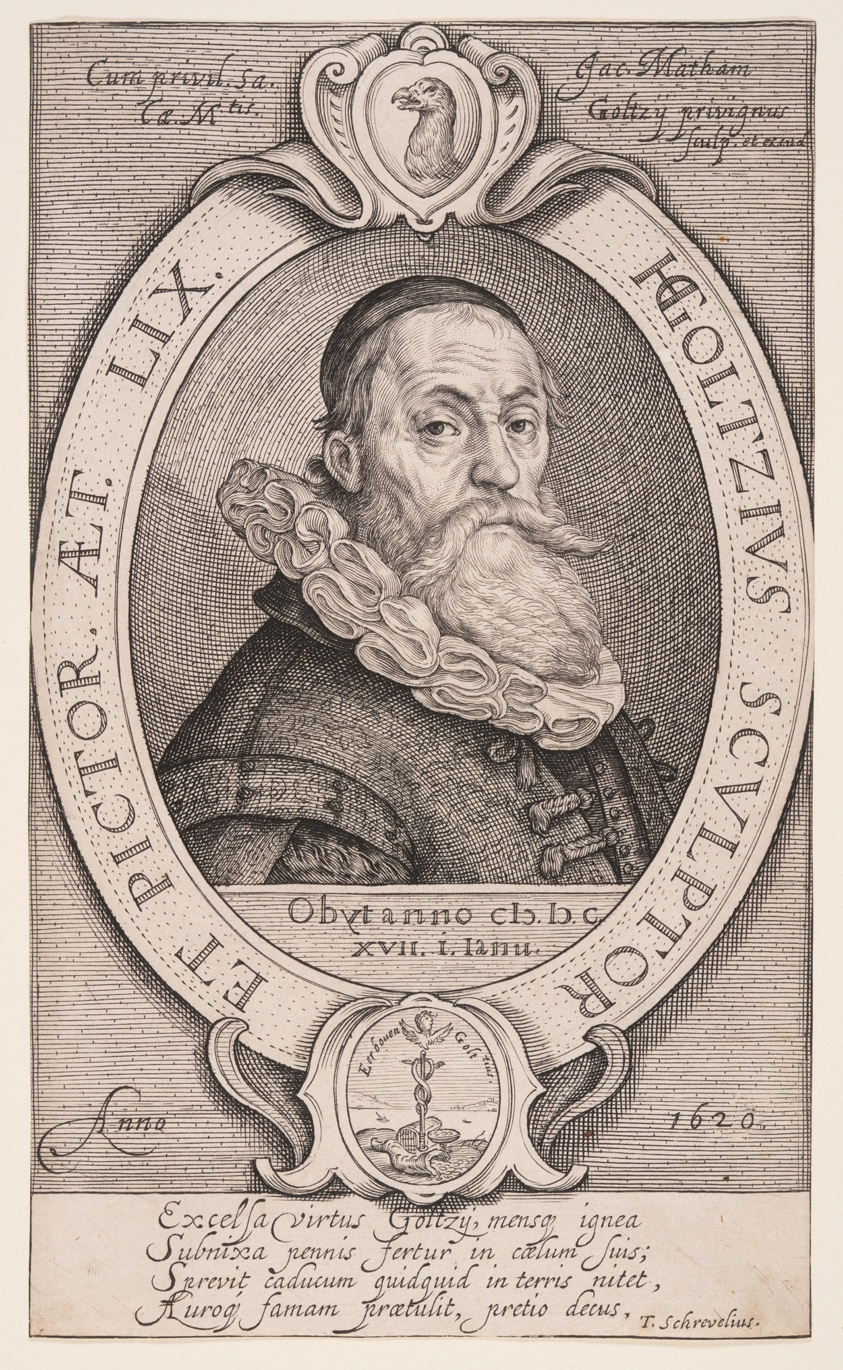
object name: Print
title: Hendrick Goltzius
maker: Jacob Matham (Dutch, 1571–1631)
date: 1618, altered in 1620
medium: Engraving on laid paper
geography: Netherlands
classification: print; engraving; paper; prints and drawing